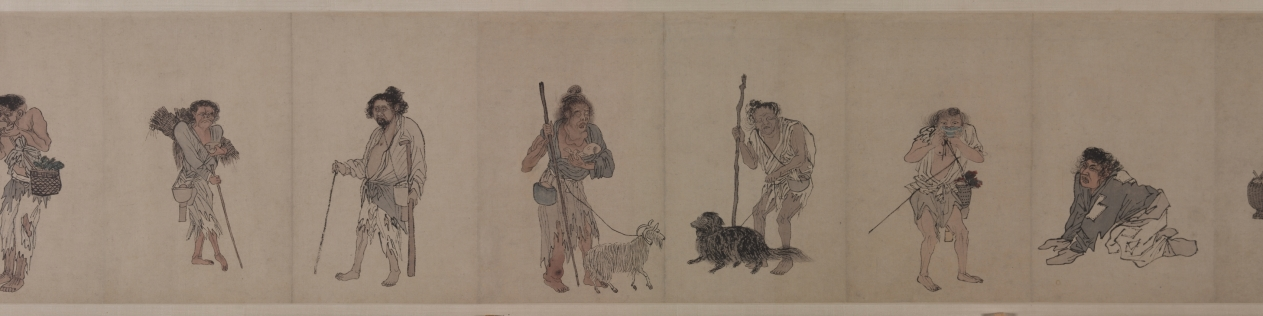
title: Beggars and Street Characters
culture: China, Ming dynasty (1368–1644)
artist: Zhou Chen (Chinese, c. 1450–c. 1536)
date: 1516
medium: Handscroll; ink and light color on paper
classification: Painting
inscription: 題: 周臣流氓圖. 古堇趙鶴琴 [印] 老鶴臨池; 鵝池軒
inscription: 正德丙子秋七月，閒窗無事 ，偶記素見市道丐者種種態度。乘筆硯之便，率爾圖寫。雖無足觀，亦可以助警勵世俗云。 東邨周臣記 [印]東邨; 舜卿; 鵝場散人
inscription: 吳中東邨周君，善丹青，尤長於人物。此圖其所見盛市丐者之狀種種，各盡其態，觀者絕倒。嗟乎，今之晝夜乞哀以求富貴者，安得起周君而貌之耶。臥雲徵君出示，余漫題其後。 甲子歲十月吳門黃姬水 [印] 士雅山人; 另一印不詳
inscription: 是冊凡數種。其飢寒流離疲癃殘疾之狀，種種之異。觀此而不惻然心傷者，非仁人也。計正德丙子逆瑾之流毒已數年。而[江]彬 [錢] 寧輩肆虐方熾。意分符剖竹諸君，亦鮮有能撫字其民者。然則舜卿此作，殆與鄭君 流民圖同意。其有補於治道者不淺，要不可以墨戲忽之也。 長洲張風翼題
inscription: 東村此筆，蓋圖寫飢寒乞丐之態，以警世俗耳。而質山 [黃姬水]欲其寫昏夜乞哀，而靈墟[張鳳翼]則擬之於安上門圖。二君之見，其各有所指哉。昔唐六如每見周筆，輒稱曰：周先生！蓋深服其神妙之不可及。若此冊者，信非他人可能而有符於六如之心伏矣。豈易得耶。若黃、張之指，則又論於畫之外，不在於形似筆墨之旨也。 萬歷丁丑十二月三日 茂苑文嘉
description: Zhou Chen from Suzhou provides rare depictions of impoverished people that once filled the city’s markets and streets. Despite Suzhou’s prosperity, its rapid growth polarized society, including the wealthy and those who had deserted their farmlands, who were without homes, unemployed, or sick. Amid these are figures who inspire fear rather than empathy. The painting may thus be informed by local practices at the end of the lunar year, in which street beggars, in exchange for food or money, would dress up like ghosts and demons to drive out evil forces.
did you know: Although Zhou Chen's original composition was an album of 24 figures, today it is mounted as two handscrolls, one in the Cleveland collection and one in the Honolulu Museum of Art.